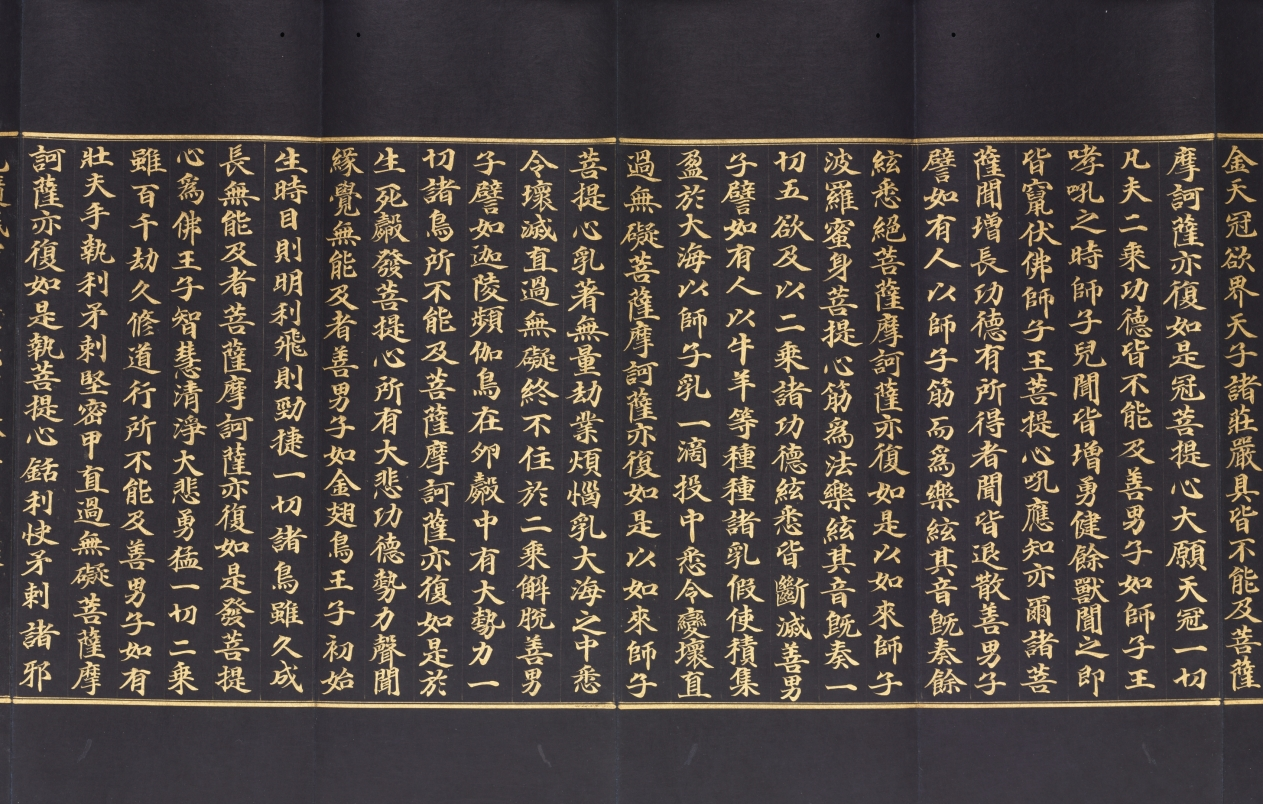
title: Avatamsaka Sutra No. 78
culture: Korea, Goryeo dynasty (918–1392)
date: 1300s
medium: Folded book with illustrated frontispiece; gold and silver on mulberry paper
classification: Bound Volume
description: This illuminated manuscript presents one part of the multivolume sacred text titled Avatamsaka (Flower Garland) sutra. Both the script and the image are rendered in gold ink on the smooth surface of the dark blue, indigo-dyed mulberry paper. This portion of the text, which reads from right to left, describes the encounter of the Buddha of the Future (Maitreya) and the young pilgrim Sudhana. The Buddha gives his words of wisdom to Sudhana, who asks questions about the path toward spiritual awakening. Mixed with ink and glue, the gold has a brilliance that strikingly reflects Sudhana’s ardent quest for understanding the way to reach enlightenment.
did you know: The pristine condition of this manuscript indicates that it was rarely used after its creation, revealing that the act of making a manuscript rather than reading it was the main religious goal.